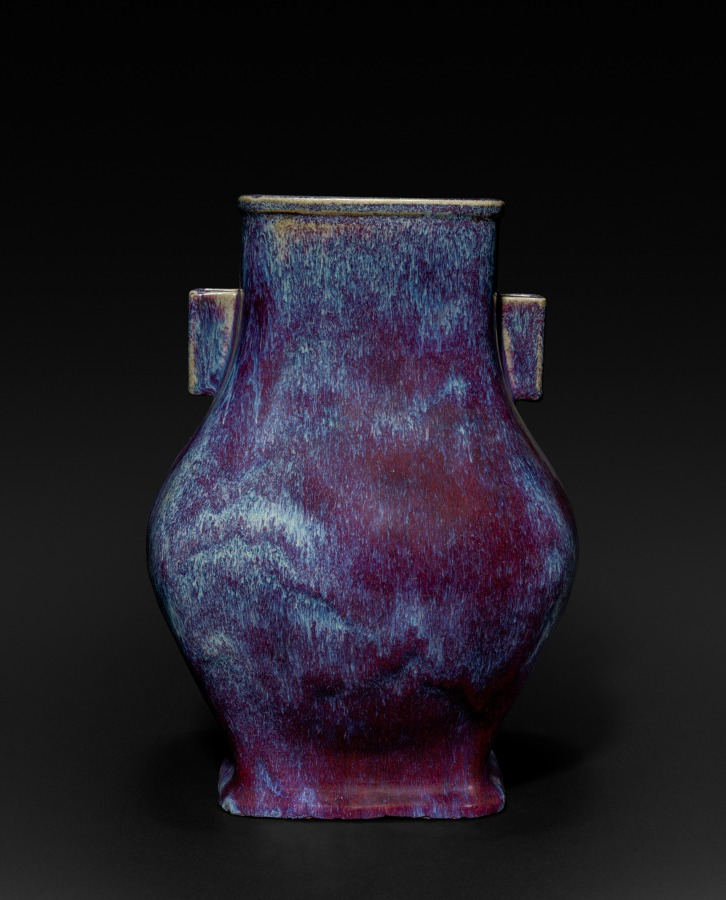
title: Flambé Vase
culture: China, Qing dynasty (1644–1911)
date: 1644–1911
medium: porcelain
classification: Ceramic